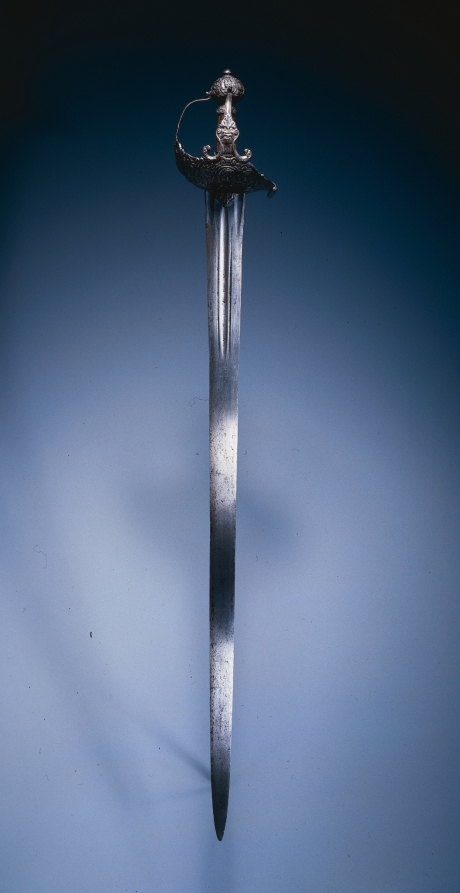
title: Basket-Hilt Broadsword ("Mortuary Sword")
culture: Hilt: England; Blade: Germany, Solingen (?), Hilt: 17th Century; Blade: 18th Century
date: hilt: c. 1640–50; blade: 1700s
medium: steel, chiseled; inlaid gilt- silver foil; wood and wire grip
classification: Arms and Armor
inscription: ANDRIA FERRARA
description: The decoration on this sword's hilt includes an image of King Charles I of England (beheaded in 1649). Because the image resembles the king's death mask, this sword is known as a "mortuary sword." It may have belonged to Sir Thomas Fairfax, a general of the Parliamentary cavalry during the English Civil War (1642-51). Large, double-edged broadswords, designed for heavy cavalry use, were common from the 1600s through the 1800s.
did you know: The ornate basket hilt which protects the hand, is chiseled with leafy decorative scrollwork and grotesque masks.